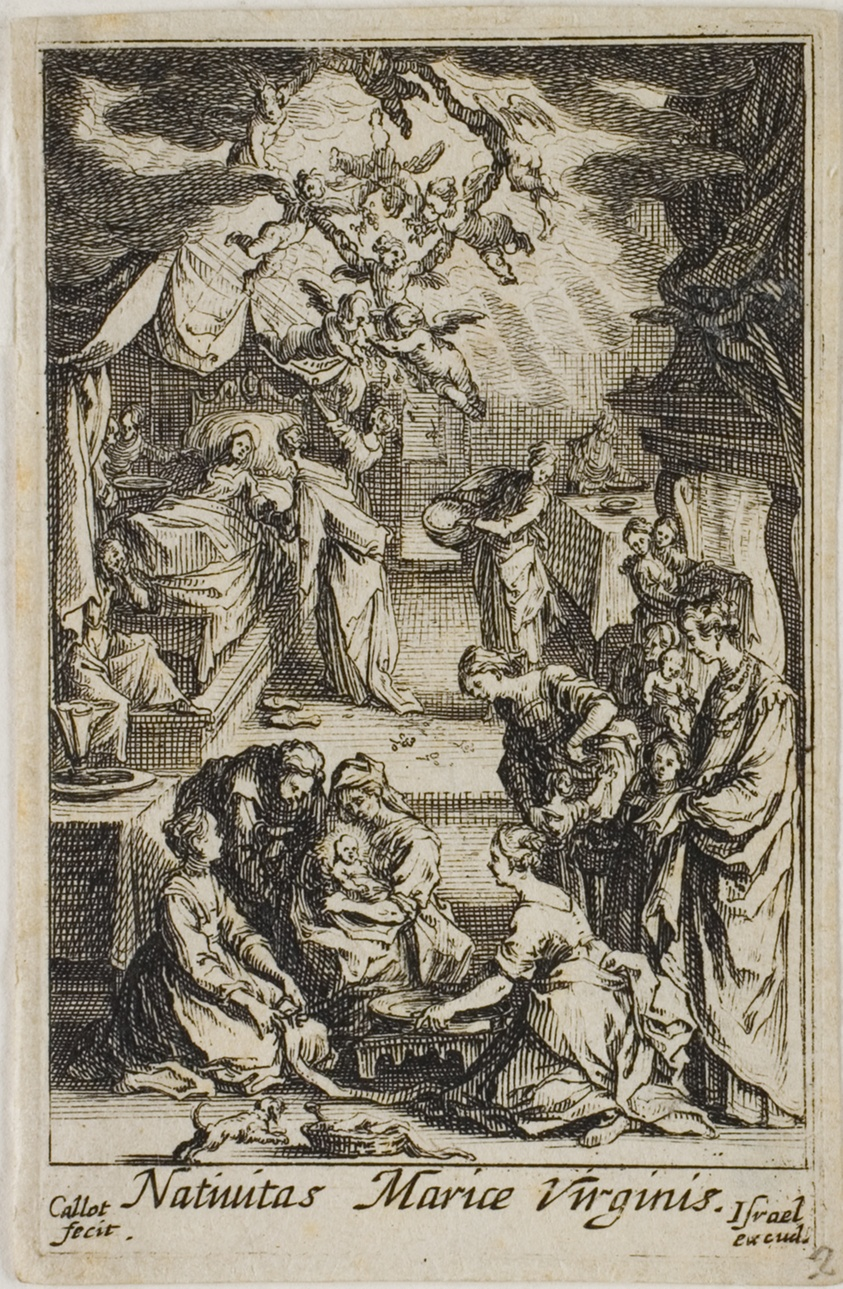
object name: Print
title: The Birth of the Virgin Mary, from The Life of the Virgin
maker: Jacques Callot (French, 1592-1635)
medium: Etching on paper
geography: France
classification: etching; print; prints and drawing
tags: Virgin Mary, Christian subjects, mythology, prints and drawings